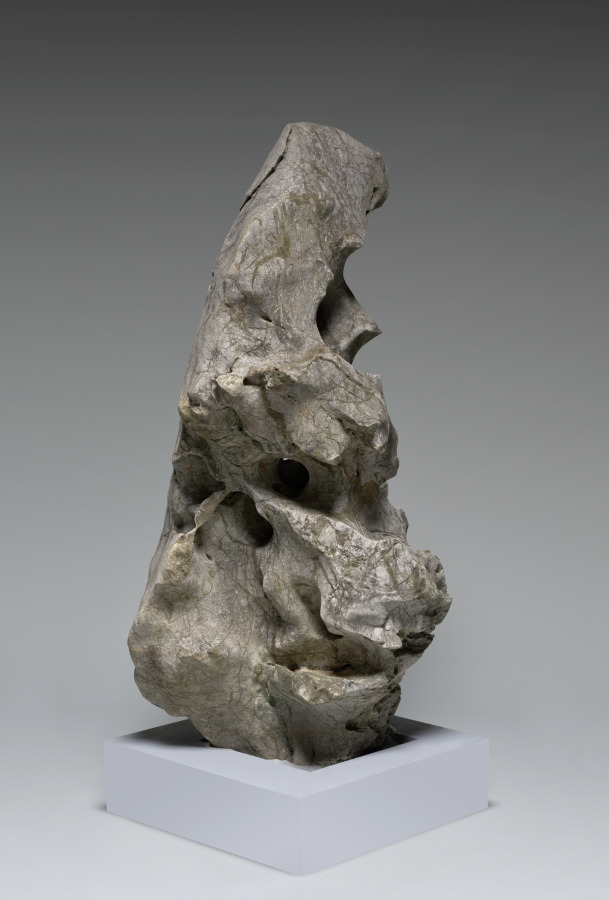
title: Taihu Garden Stone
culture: China, Jiangsu province, Wuxi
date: 0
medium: Limestone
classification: Stone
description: In China, rocks are considered elements of nature that possess spirit and life energy. With its upward winding masses, perforations, weathered surface, and multiple viewpoints, the stone exhibits sculptural qualities and embodies constant transformation through natural forces and human intervention. A solid piece of rock, it was originally sourced from the Lake Tai region. Stones were collected, set up in gardens, or installed on scholar’s desks as miniature mountains. Traditionally, Taihu stones were the most desirable type of rock. This stone is a gift by the contemporary artist Liu Dan, known for his depictions of rocks, who calls them "the stem cells of Chinese landscape."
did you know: The donor, Liu Dan, is the most prominent and celebrated painter of rocks in contemporary China.